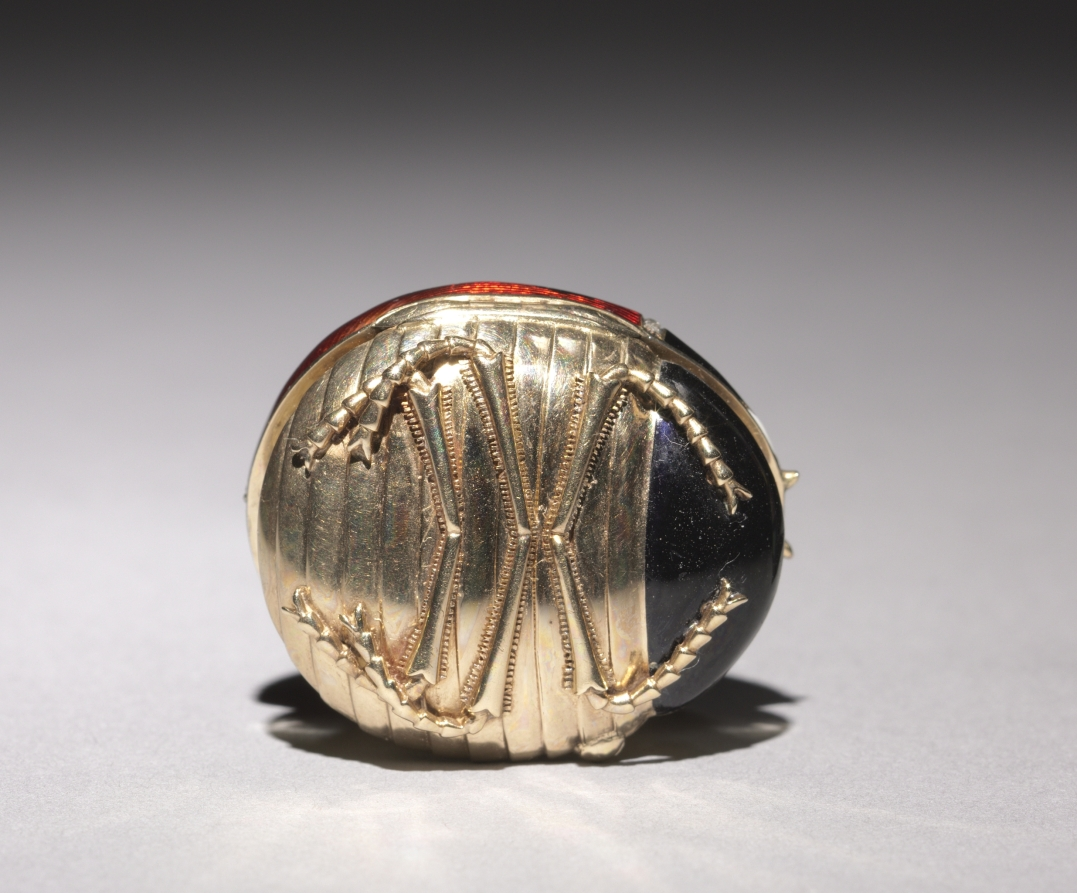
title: Ladybird Beetle Pillbox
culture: Russia, St. Petersburg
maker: House of Fabergé (Russian, 1842–1918)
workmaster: Mikhail Evlampievich Perkhin (Russian, 1860–1903)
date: 1896–1903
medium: gold, enamel, diamonds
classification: Miscellaneous